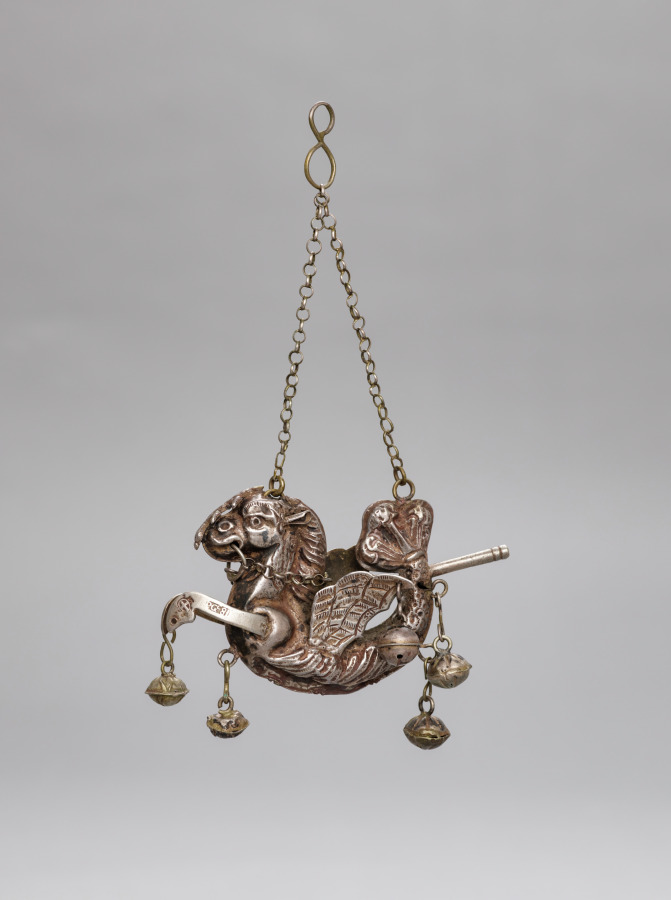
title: Rattle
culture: Italy, Sicily, 18th century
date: 1700s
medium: silver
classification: Silver